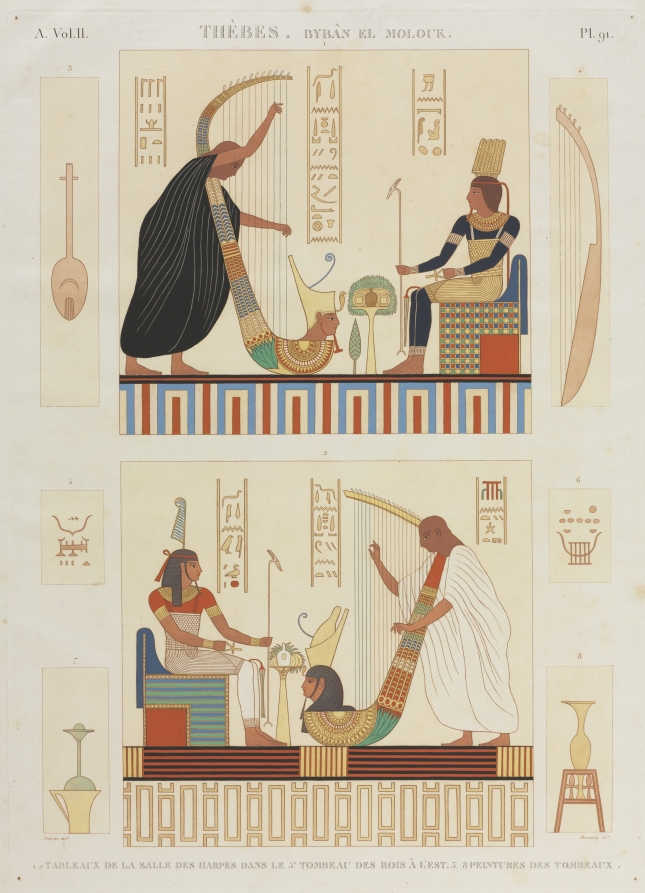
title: Description of Egypt: Thebes Byban el Molouk, Vol. II, Pl. 91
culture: France, 19th century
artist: Antoine Maxime Monsaldy (French, 1768–1816)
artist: after André Dutertre (French, 1753–1842)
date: 1812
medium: engraving, printed in sanguine hand-colored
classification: Print